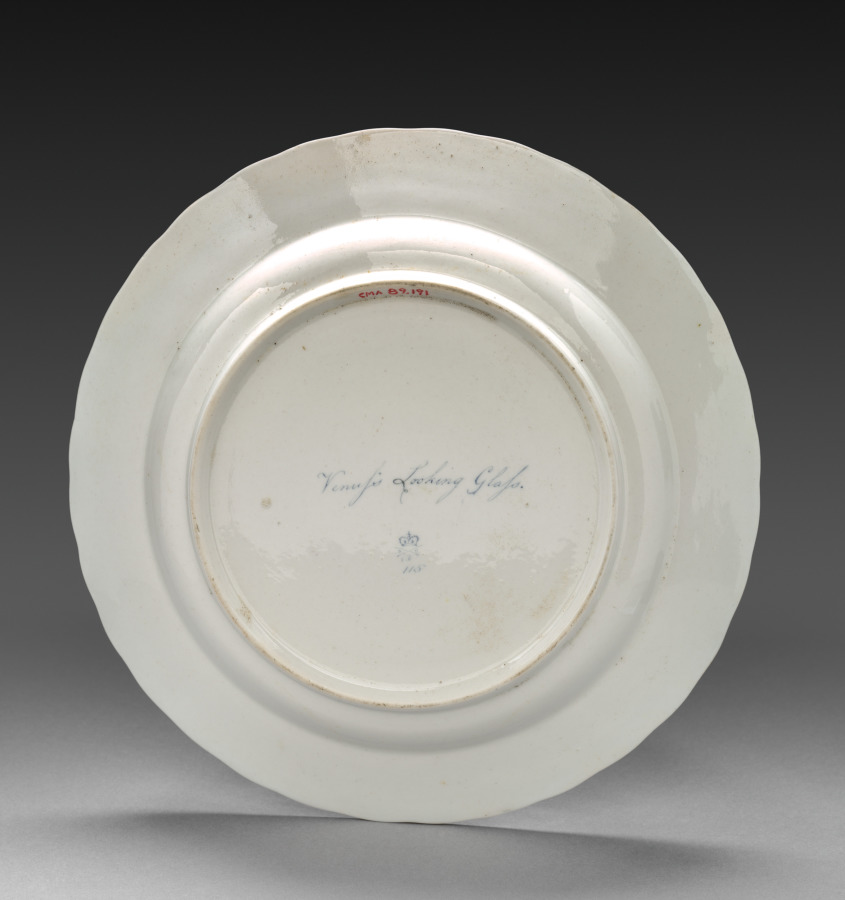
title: Plate from Dessert Service: Venus Looking Glass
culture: England, Derby, 18th century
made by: Derby (Crown Derby Period) (British)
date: c. 1800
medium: porcelain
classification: Ceramic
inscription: inscribed in blue on back: Venuf's Looking Glafs./ crown/ crossed batons and dots/D/115.